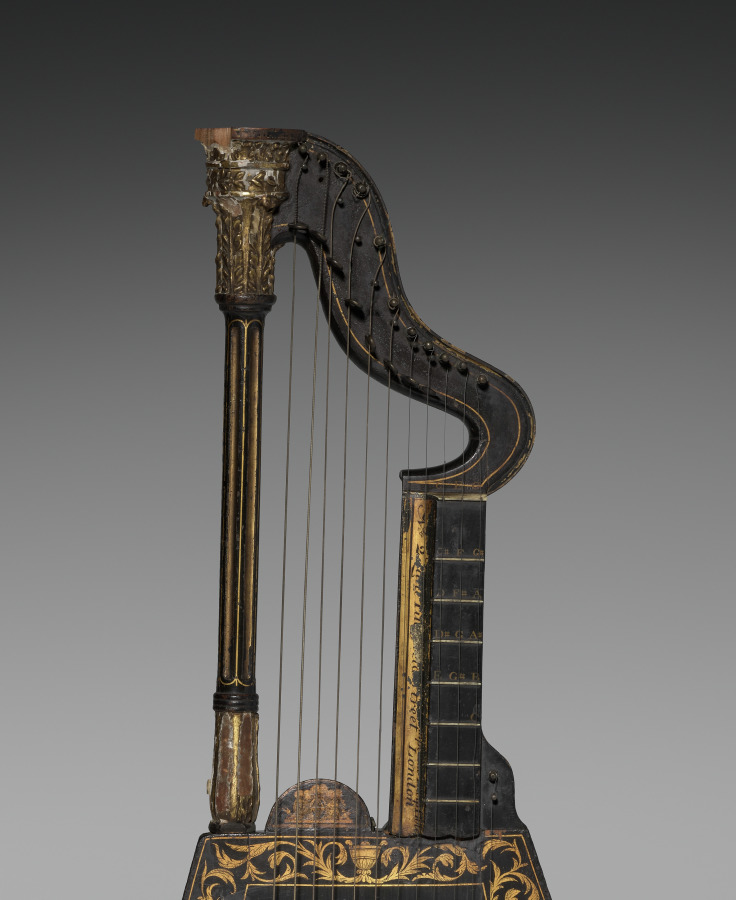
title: Harp-Lute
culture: England, London, 18th century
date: 1700s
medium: varnished wood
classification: Musical Instrument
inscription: the maker's name is illegible, but the number of the instrument is 14.